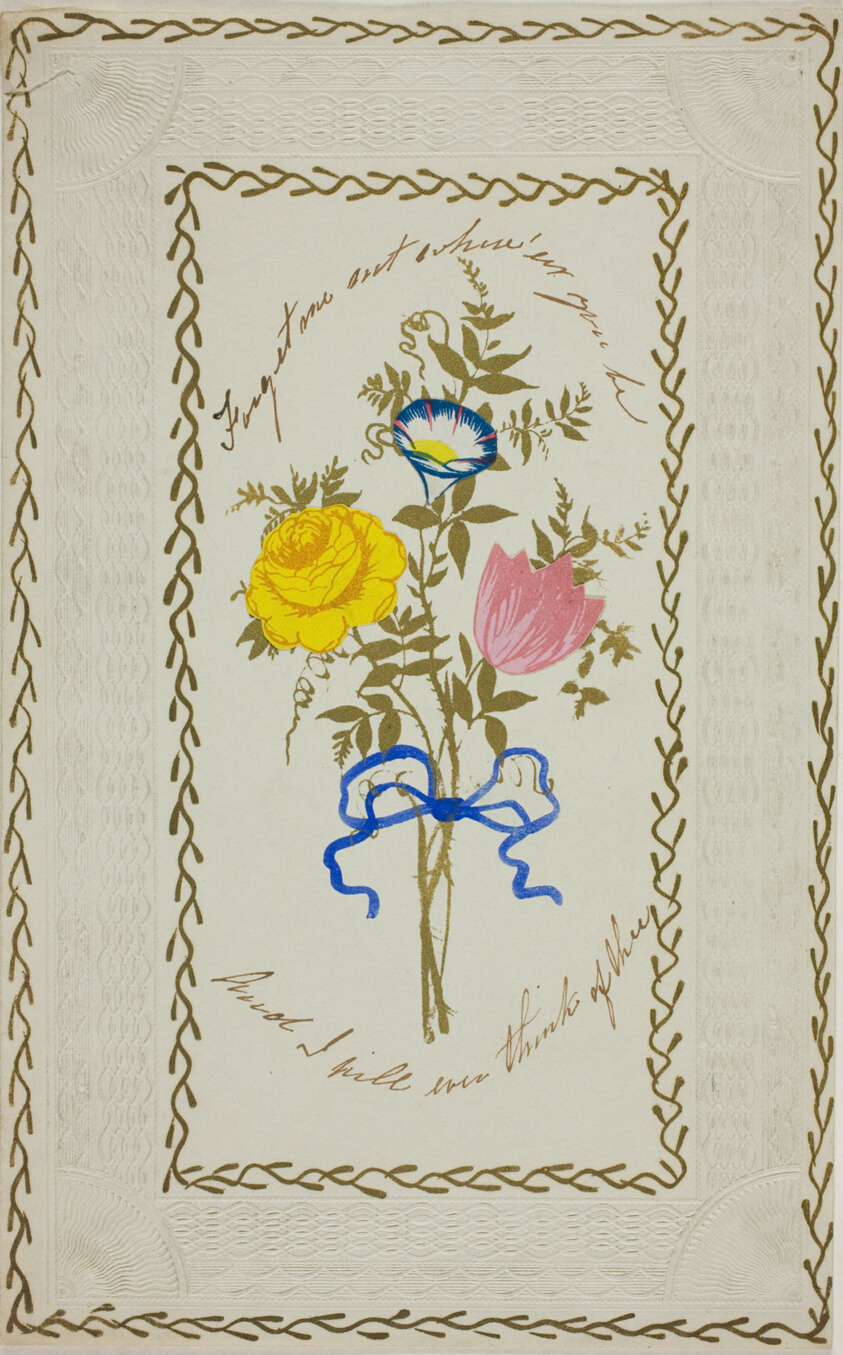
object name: Drawing and Watercolor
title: Forget Me Not (valentine)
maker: Unknown Artist; English, 19th century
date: c. 1840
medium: Collaged elements with watercolor and pen and black ink on color lithograph on embossed ivory wove paper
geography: England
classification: valentine; prints and drawing; paper